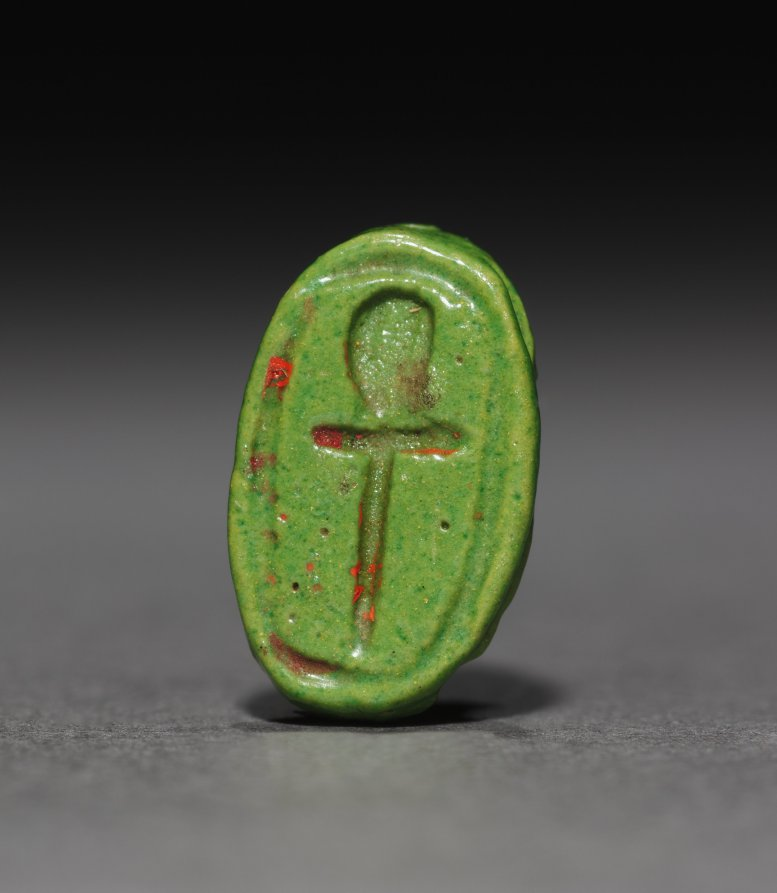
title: Sleeping Duck Amulet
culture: Egypt, New Kingdom (1540–1069 BCE), Dynasty 18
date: 1350–1296 BCE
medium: polychrome faience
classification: Amulets